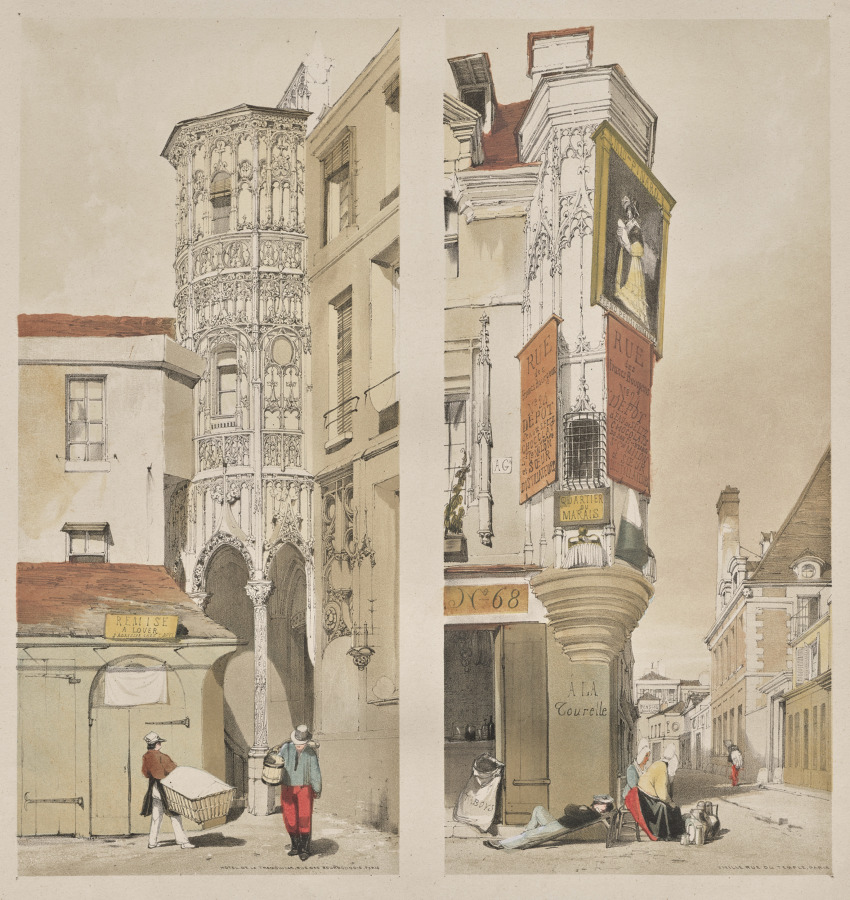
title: Picturesque Architecture in Paris, Ghent, Antwerp, Rouen: Hôtel de la Tremouille, Rue des Bourbonnois, Paris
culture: England, 19th century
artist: Thomas Shotter Boys (British, 1803–1874)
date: 1839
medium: lithograph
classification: Portfolio